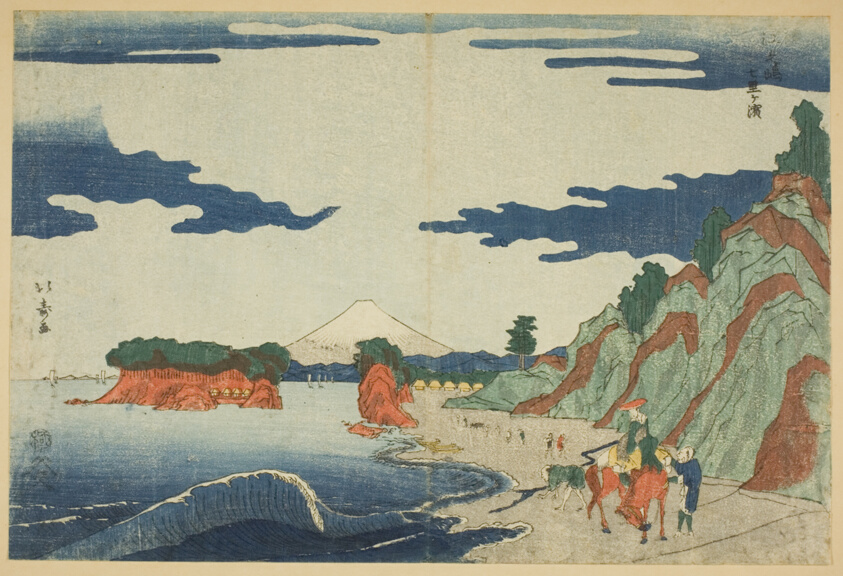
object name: Print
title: Shichiri Beach at Enoshima (Enoshima Shichirigahama)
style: edo (japanese period), Japanism, East Asian, asian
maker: Shotei Hokuju (Japanese, active c. 1789-1818)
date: c. 1789/1818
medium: Color woodblock print; oban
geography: Japan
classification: woodblock print; print; asian art